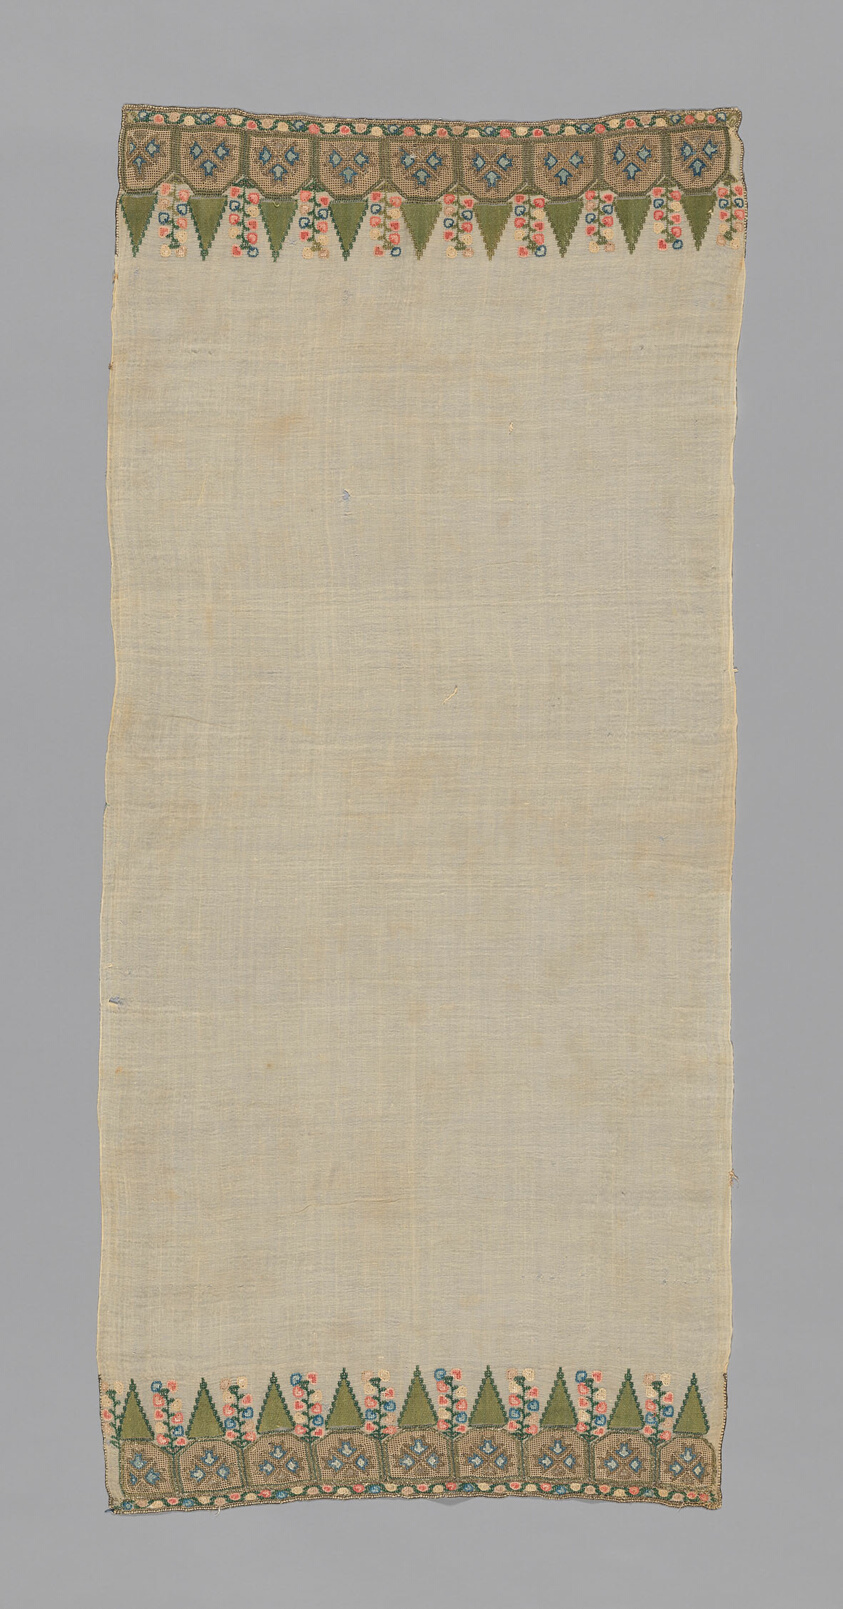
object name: Textile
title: Towel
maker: Turkey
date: 19th century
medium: embroidered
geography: Turkey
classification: textile; weaving; needlework (visual works)